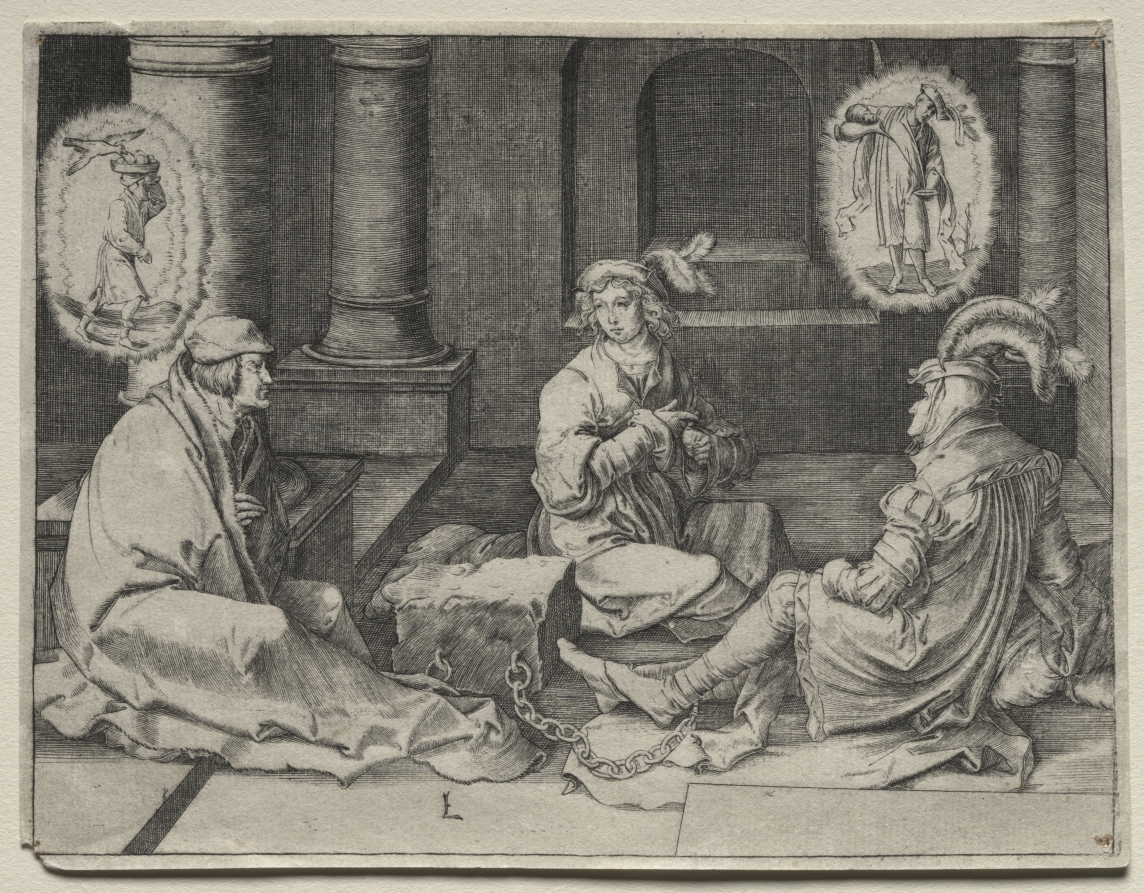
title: Joseph Interprets the Dreams in Prison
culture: Netherlands, 16th century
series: The Story of Joseph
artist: after Lucas van Leyden (Netherlandish, 1494–about 1533)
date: 1512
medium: engraving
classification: Print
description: In the book of Genesis, Joseph, a son of Jacob, is the model of a righteous man who overcomes adversity by following God. This scene shows how, imprisoned in Egypt, two fellow prisoners ask Joseph to interpret their dreams. On the right, we see the cupbearer’s dream, in which he squeezes grapes into the pharaoh’s cup to offer wine. Joseph interprets this to mean that the man will be released and restored to his former life. The baker’s dream, on the left, unfortunately has the opposite interpretation, leading to the man’s execution. According to Christian people, the wine and bread references also foretell Christ’s death and resurrection.